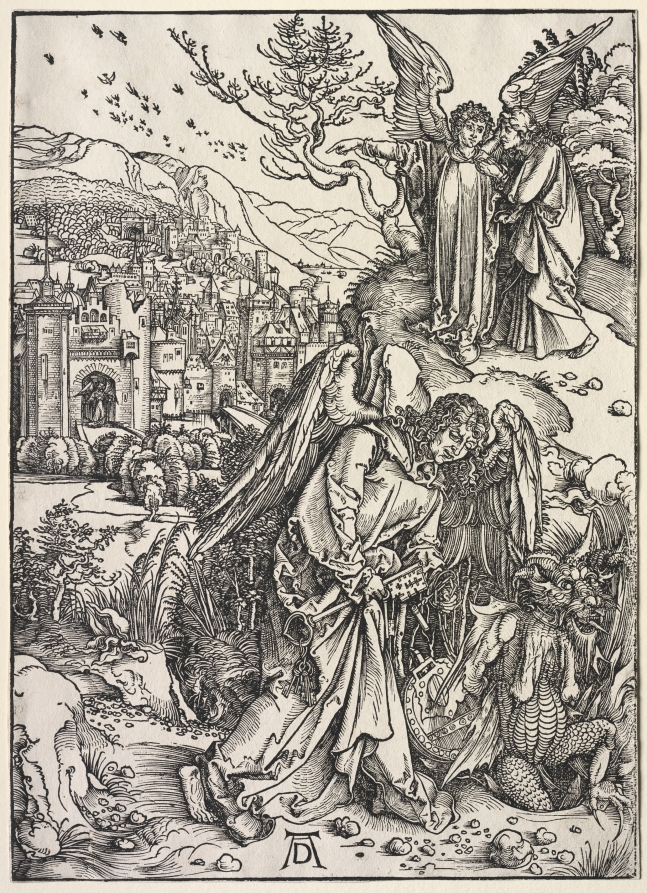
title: Revelation of St. John: Angel with the Key of the Bottomless Pit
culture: Germany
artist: Albrecht Dürer (German, 1471–1528)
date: 1511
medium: woodcut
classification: Print